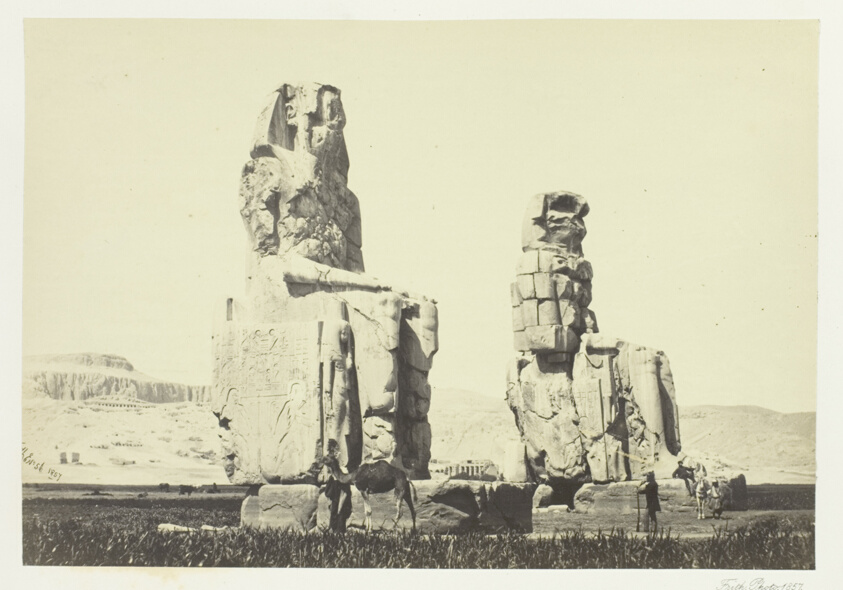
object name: Photograph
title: The Statues of Memnon, Plain of Thebes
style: 19th century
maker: Francis Frith (English, 1822–1898)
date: 1857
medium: Albumen print, from a two volume set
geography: England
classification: photograph; albumen silver print; photography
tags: Collected by Hugh Edwards, Egypt and Palestine